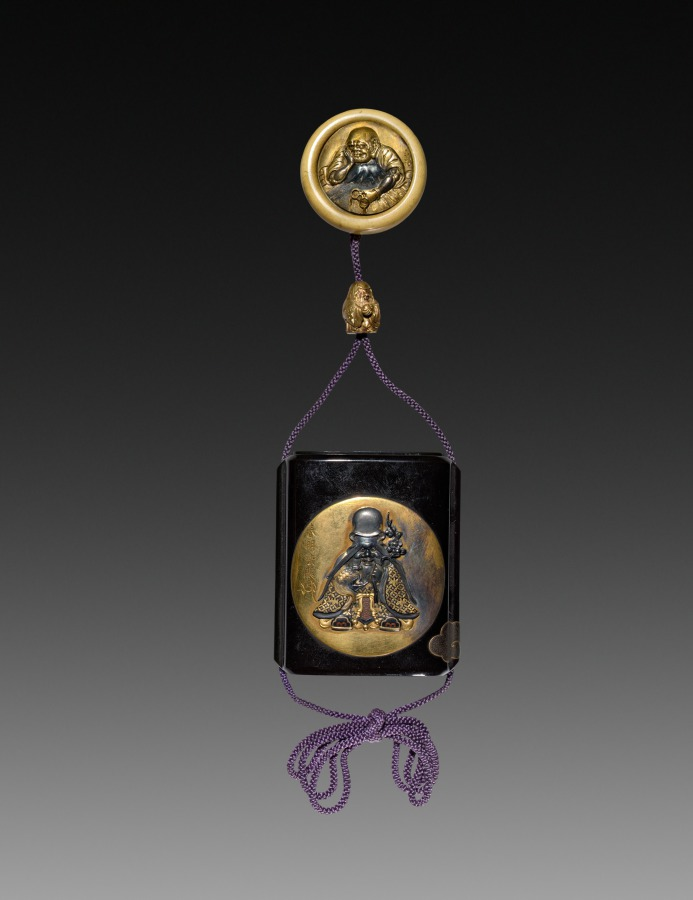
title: Inro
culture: Japan, Edo period (1615–1868)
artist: Ikeda Taishin (Japanese, 1829–1903)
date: mid-1800s to early 1900s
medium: lacquer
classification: Lacquer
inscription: Signature: Taishin